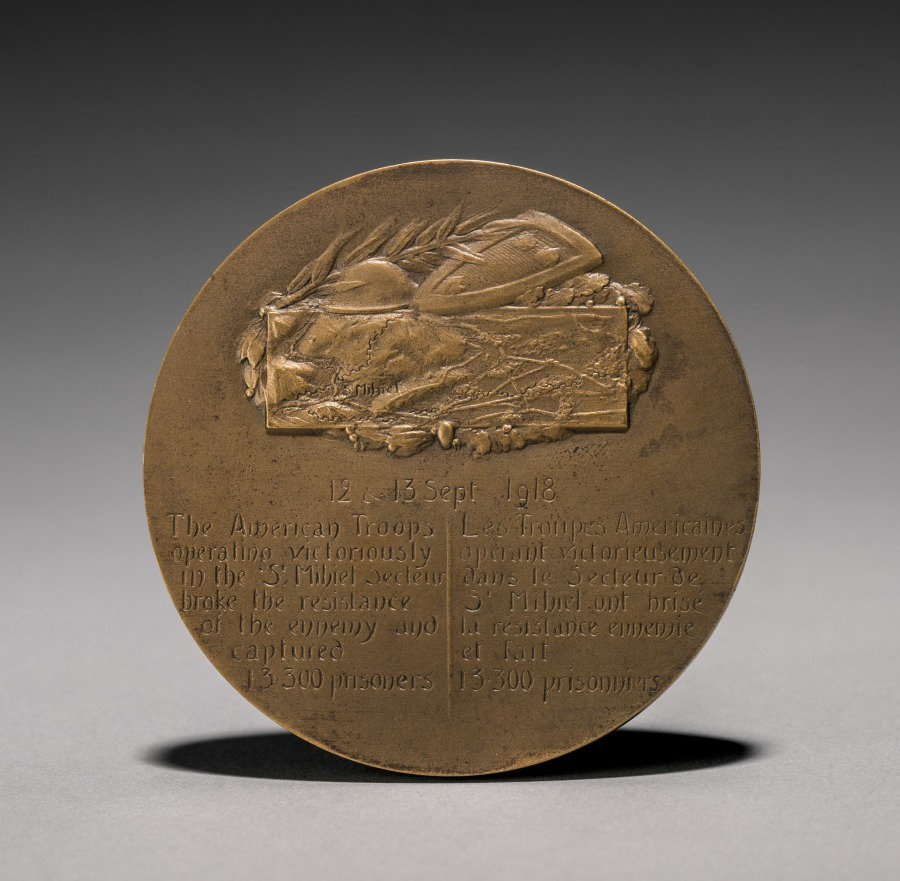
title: Medal (reverse)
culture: France, 20th century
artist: Edouard Fraisse (French, 1880–1945)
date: 1900s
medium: bronze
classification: Metalwork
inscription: "12 - 13 Sept. 1918"; in French and English: "The American Troops operating victoriously in the St. Mihiel secteur broke the resistance of the enemy and captured 13,300 prisoners."